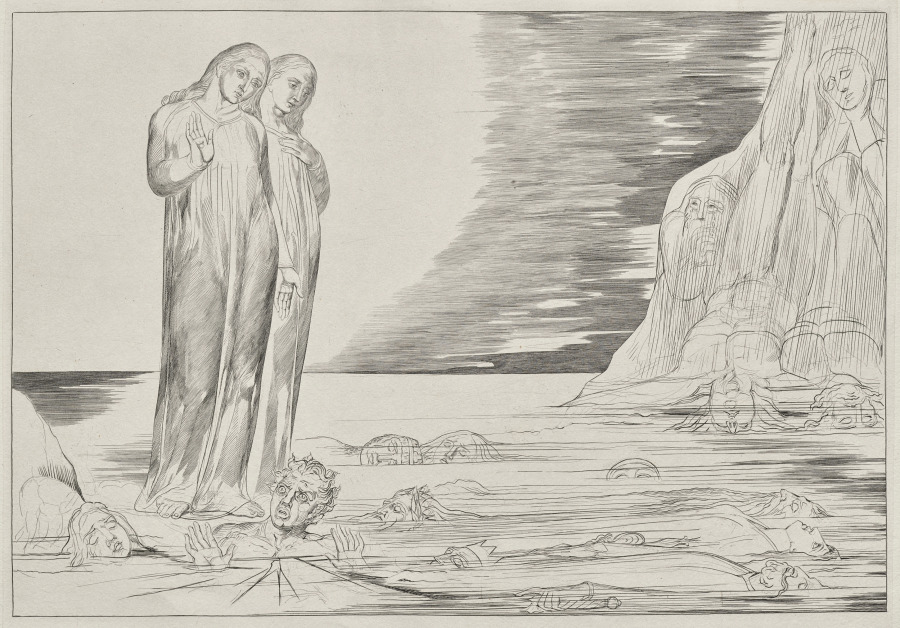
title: The Circle of the Traitors: Dante's Foot Strriking Bocca degli Abbate, from Dante's Inferno, Canto XXXII Illustration to Dante's The Divine Comedy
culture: England, Early 19th century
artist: William Blake (British, 1757–1827)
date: 1827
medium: engraving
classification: Print